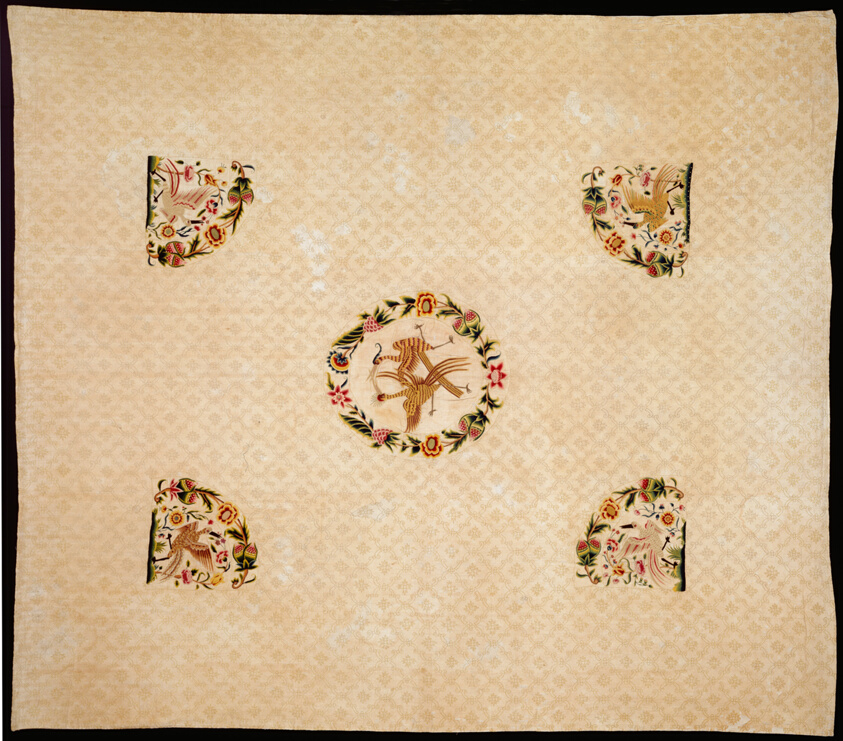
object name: Textile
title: Bedcover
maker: England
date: c. 1720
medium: Two layers of linen, plain weave; embroidered with silk and wool in back, satin, and stem stitches; laid work, couching, and French knots; three panels joined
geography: England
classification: textile; needlework - quilt